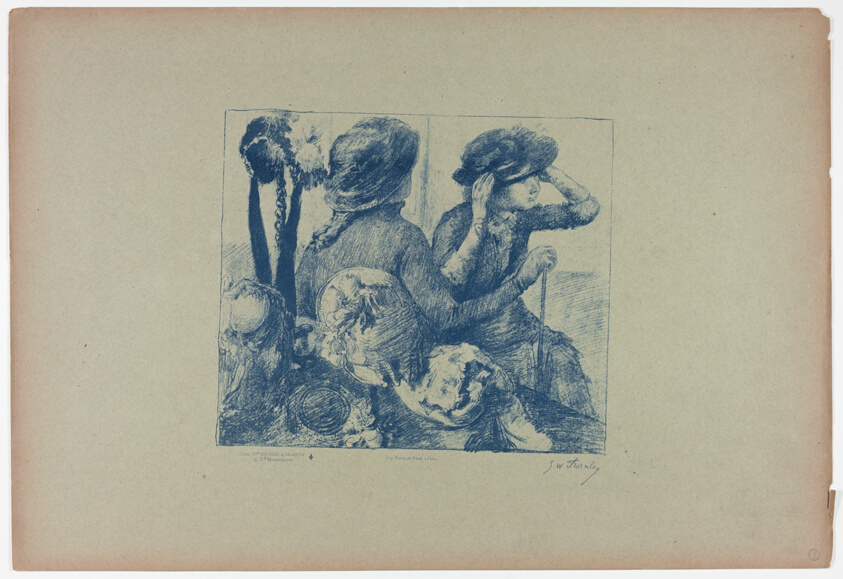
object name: Print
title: Women in a Hat Shop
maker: Georges-William Thornley (French, 1857-1935); after Edgar Degas (French, 1834-1917); printed by Atelier Becquet (French, 19th century); published by Boussod, Valadon, & Company (French, 18th-19th century)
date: 1889–90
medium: Lithograph on paper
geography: France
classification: lithograph; print; prints and drawing